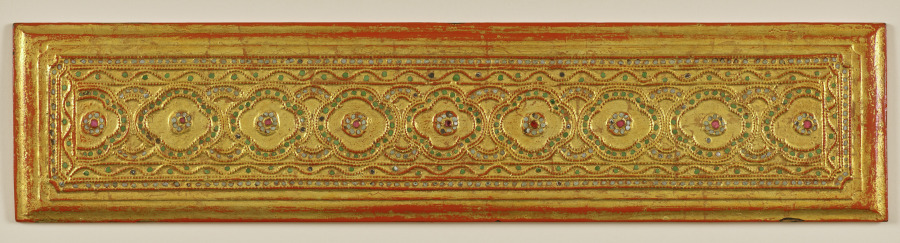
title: Kammavacha: Buddhist Ordination Text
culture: Myanmar (Burma)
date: 1800s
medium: Cover: lacquer, gilding, and glass appliqué on wood; leaves: lacquer and gilding on cloth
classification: Manuscript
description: In premodern Burma, lay people commissioned lavishly ornamented manuscripts for ceremonial occasions, when officiants would read aloud from the text. Written in black lacquer, the text is in the language of Pali written in a Burmese script. It contains ordination rites and procedures for monastic ceremonies. The second to last page is covered with intricately drawn, winged celestial beings (nats) in gestures of praise. They fly amid intertwining vegetation—denoting bounty—that grows from serpentine forms that refer to rain clouds. Lionlike forms inhabit the space with them. The top and bottom covers are equally ornamented with jeweled floral patterning.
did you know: The Pali text of this manuscript is written in Burmese square script, which is also known as "tamarind seed script."